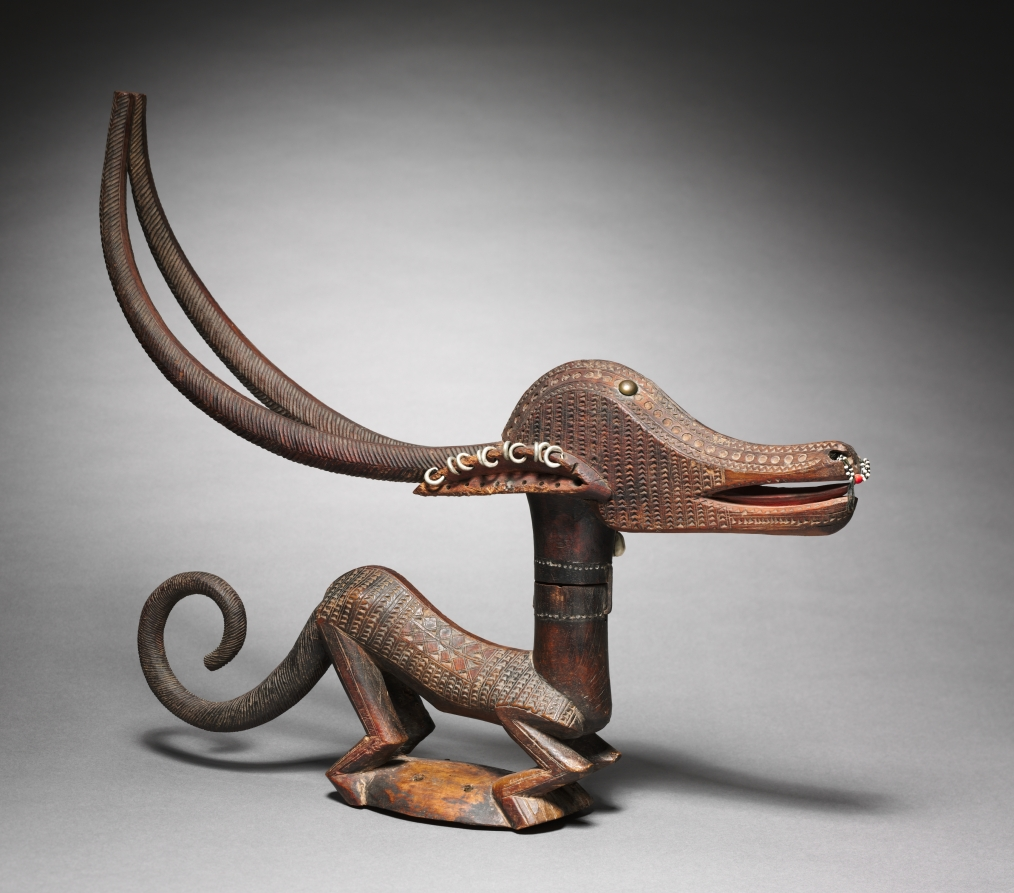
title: Headdress (chi wara)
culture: Africa, West Africa, Mali, Bamana-style blacksmith-carver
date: early to mid-1900s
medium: Wood, cowrie shells, glass beads, possibly aluminum, iron alloy, upholstery studs, and natural fibers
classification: Mask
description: Chi wara—a mythical “farming beast”—was said to teach farming to the Bamana people. Carved patterns cover this female chi wara’s body, highlighting its muscles and emphasizing that it is no earthly animal, but rather an agricultural spirit that combines human, antelope, and anteater elements. This example wears earrings and a nose ring of imported metals and beads. Its carver—a blacksmith—used a naturalistic style common south of the city of Bamako. Accompanied by women’s songs, male performers danced paired male-and-female chi wara headdresses affixed to basketry caps at agricultural competitions and weddings.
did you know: Chi wara headdresses look different depending on the region they were made in. The style of this example tells us it was likely made in the Djitoumou region of southern Mali.